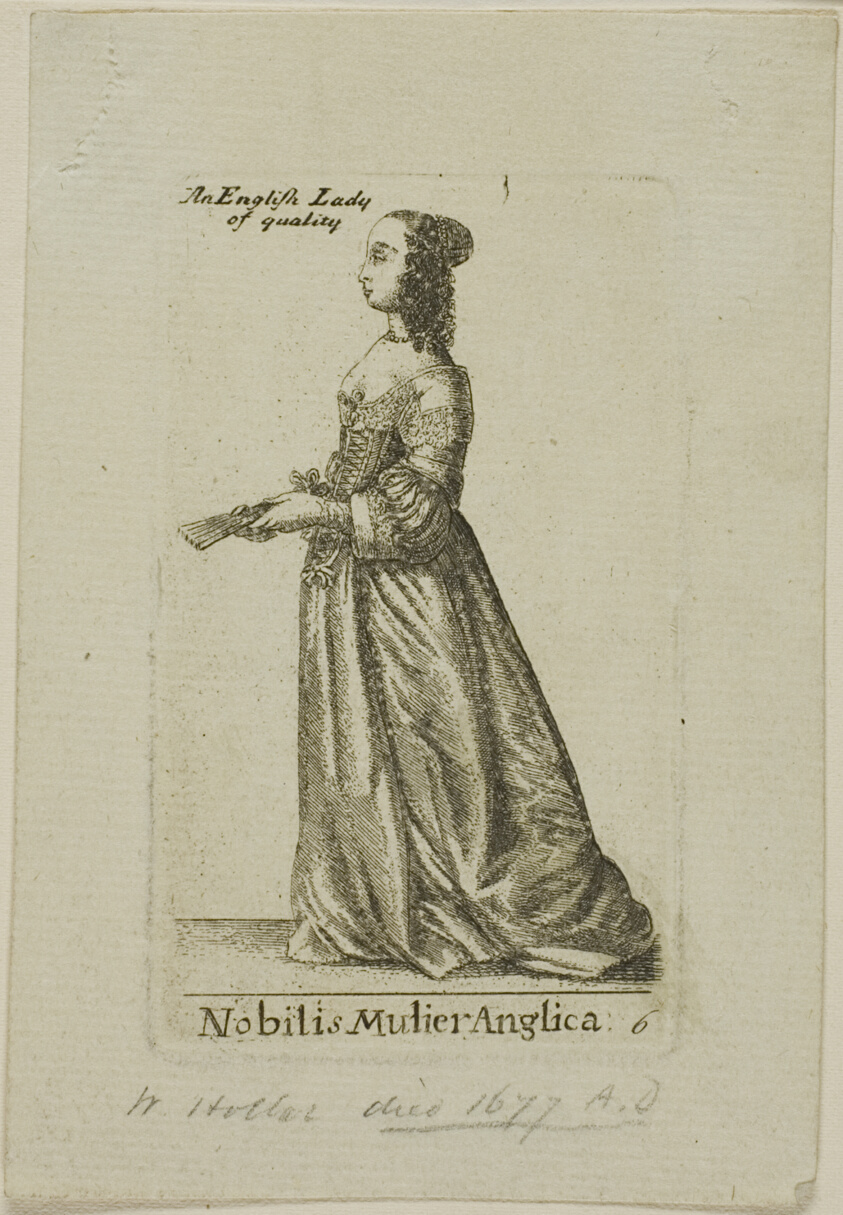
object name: Print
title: English Noblewoman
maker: after Wenceslaus Hollar; Bohemian, 1607-1677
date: c. 1673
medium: Etching on ivory laid paper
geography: Bohemia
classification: etching; print; prints and drawing